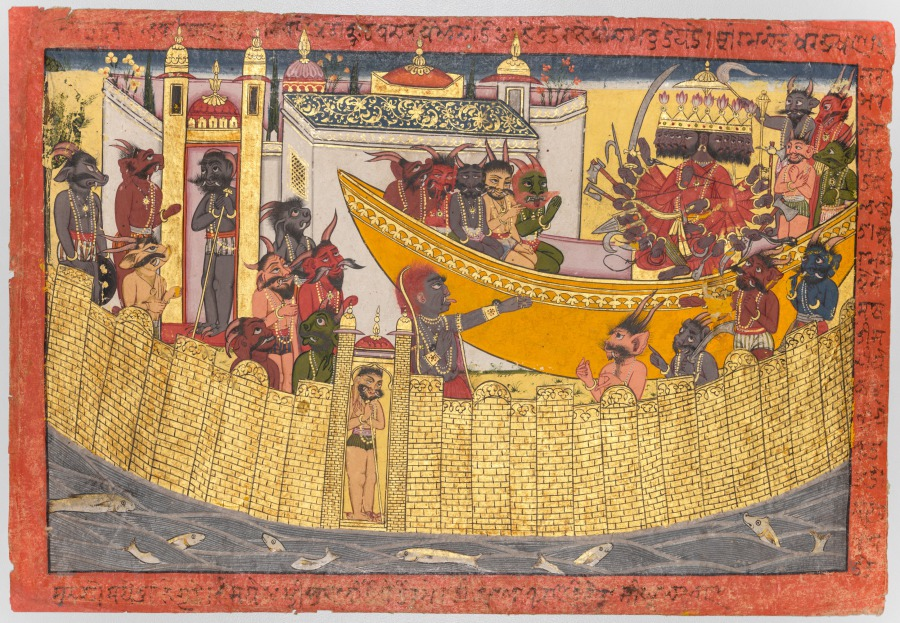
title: Shurpanakha demands vengeance, from the "Shangri" Ramayana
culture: Northern India, Pahari kingdoms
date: c. 1700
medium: Gum tempera, ink, and gold on paper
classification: Painting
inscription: [[verso, lower right corner, in Sanskrit, upside down]] aranya 31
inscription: [[recto, in the borders, indistinct Takri script]] Shurpanakhā (?)--- lankā āyī ---- rāvaṇe prati jhūth bachan boldī hoyi je tan raje bich matra (?) hoyī hai. Sri rām chandre khar dūsana sāra māre mera dheya(?) hoyā. Sri rām chandre de sath isdī ek istri ----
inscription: [[verso, top, in Takri script]] 71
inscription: [[verso, left side, in Takri script]] 71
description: In a dramatic climax, the artists introduce the demon king, Ravana (the Howler), archvillain of the Ramayana. He has 10 crowned heads and 20 arms. He grasps a different deadly weapon in each hand; they reveal his supreme powers. The demon Shurpanakha’s nose and ears are healing, but her desire for revenge is stronger than ever. She gestures emphatically at her brother Ravana, urging him to find a way to destroy Rama, perhaps by kidnapping Rama’s wife. More gold has been lavished on this painting than any other known from the “Shangri” Ramayana, suggesting that it is meant to stand out as a scene of primary importance.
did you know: The Ramayana of Valmiki describes Shurpanakha as hideous, misshapen, and potbellied with hair the color of copper.